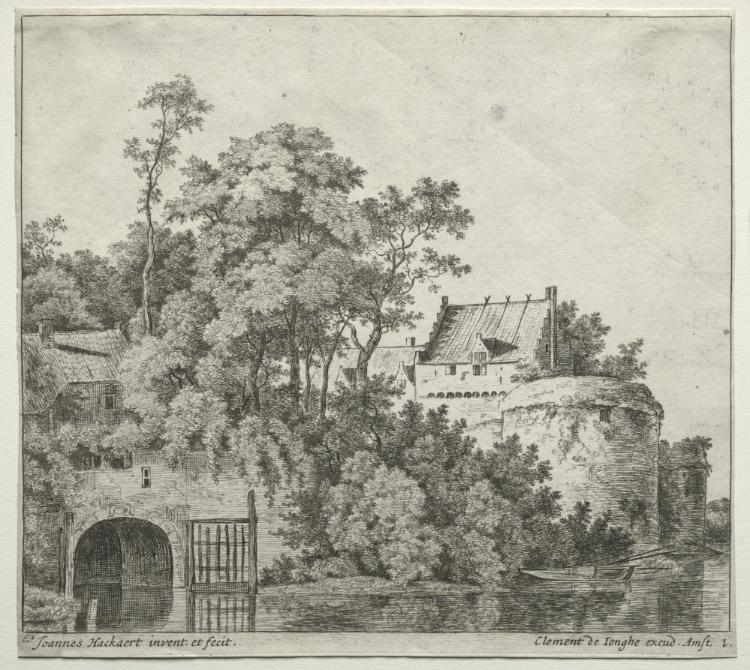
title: Bourges: The Gate to the City of Gorcum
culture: Netherlands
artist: Jan Hackaert (Dutch, 1629–c. 1700)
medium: etching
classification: Print